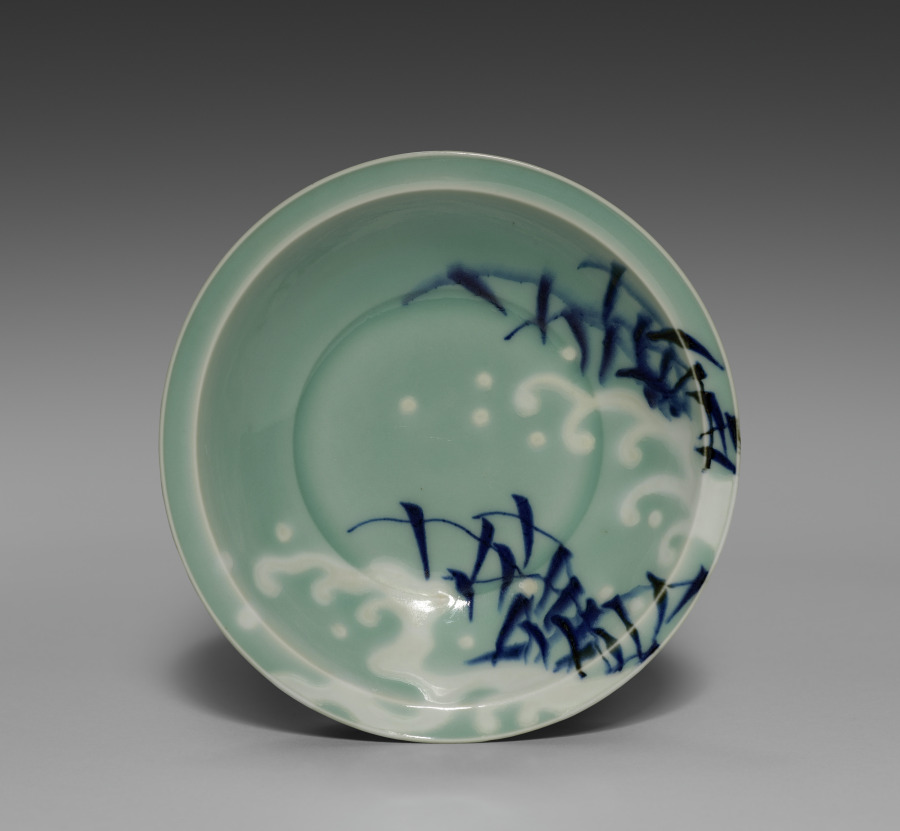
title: Small Dish (Kozara) with Waves and Reeds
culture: Japan, Edo period (1615–1868)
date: late 1600s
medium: Porcelain with underglaze blue and celadon (Hizen ware, Nabeshima type)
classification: Ceramic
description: This dish has a green glaze often called celadon in English.